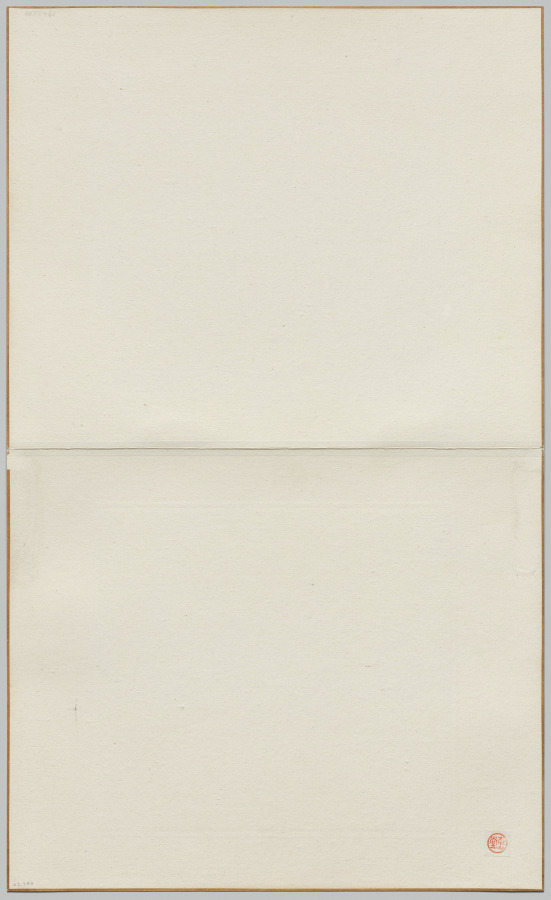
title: Cottages in a Misty Grove in Autumn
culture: China, Northern Song dynasty (960-1127)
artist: Li Anzhong (Chinese, active first half of the 1100s)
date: 1117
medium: Album leaf; ink and color on silk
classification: Painting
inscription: Artist's inscription: In the ting-yu year [1117], Li An-chung painted. 2 seals of Wu T'ing (ca. 1600).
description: This leaf is an early example of a new mode in landscape painting expressed in vistas of water-rich scenery that developed since the 900s. Li Anzhong, a court artist during the 1100s, witnessed the transition of the capital from Kaifeng across the Yangzi River to Hangzhou.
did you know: This painting showcases a delicate painting technique and an intimate view.